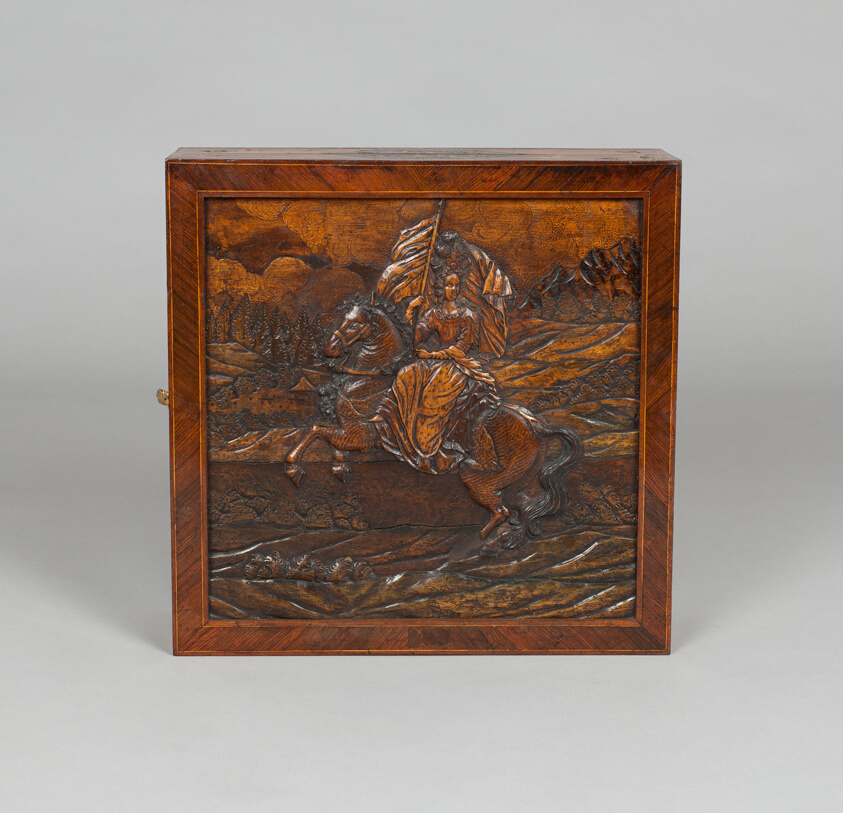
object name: Furniture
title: Game Board for Chess and Backgammon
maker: Attributed to Johann Nicolaus Haberstumpf (German, active 1691–1728); Czech Republic, Bohemia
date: c. 1700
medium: Walnut and colored maple with fruitwood and boxwood inlay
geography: Bohemia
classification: wood; european decorative arts; furniture